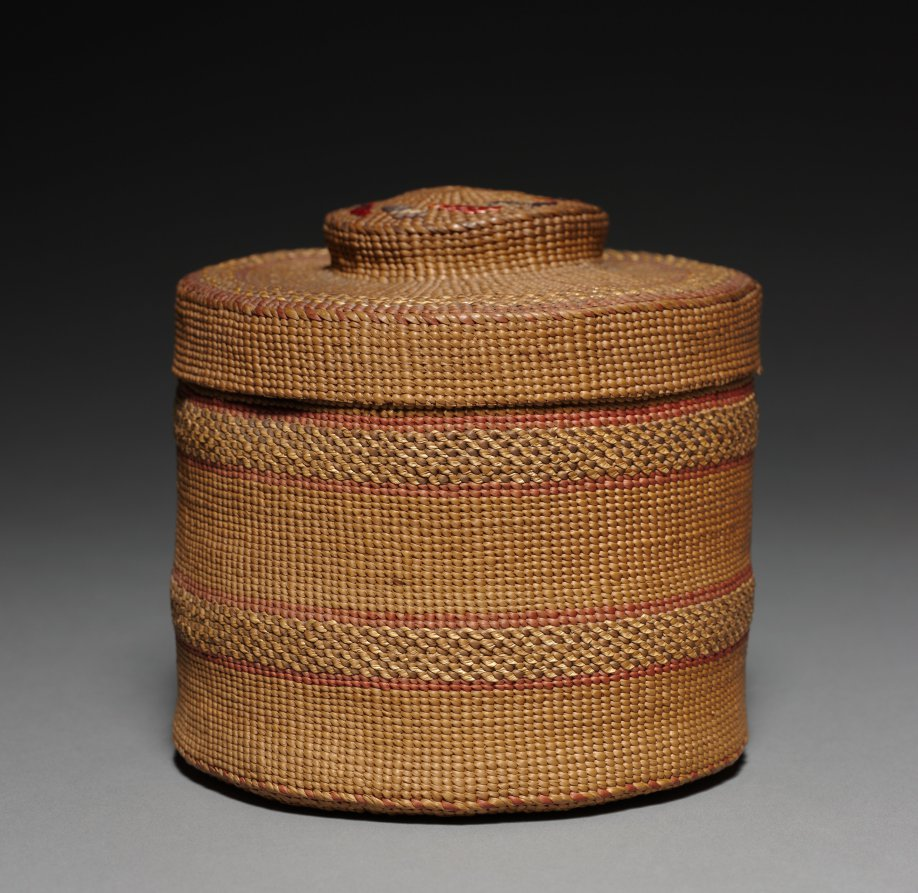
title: Covered Basket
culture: Northwest Coast, Haida, Unassigned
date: Unassigned, before 1917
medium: twilled, imbricated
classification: Basketry